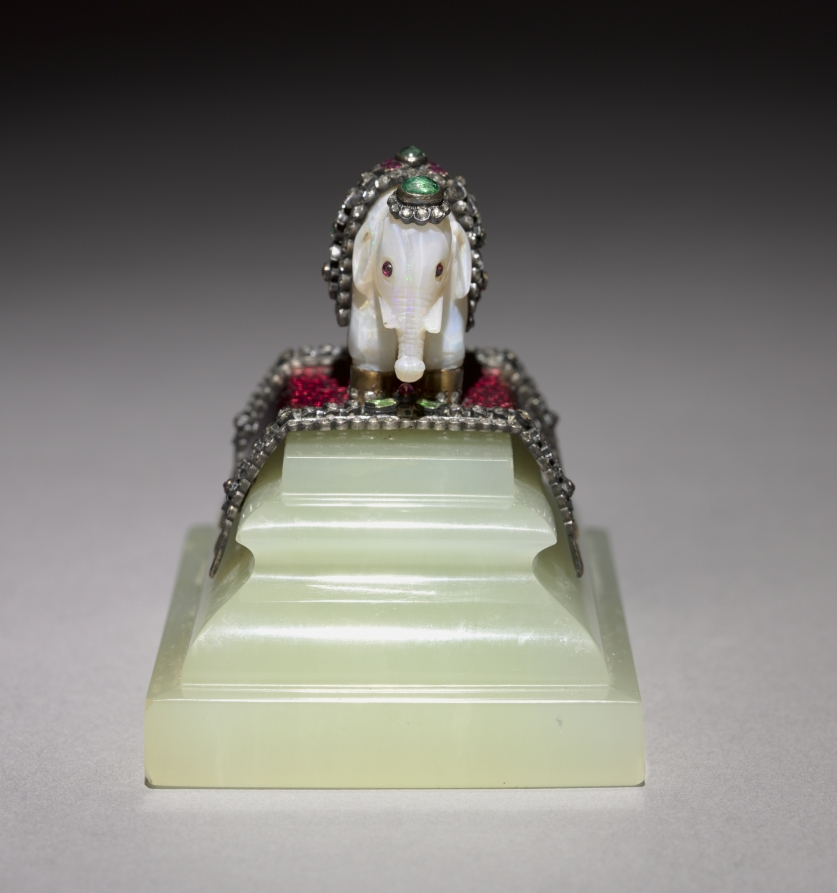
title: Elephant Bell Push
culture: Russia, St. Petersburg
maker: House of Fabergé (Russian, 1842–1918)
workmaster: Henrik Wigström (Russian, 1862–1923)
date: after 1903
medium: jade, gold, rubies, emeralds, diamonds, enamel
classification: Miscellaneous